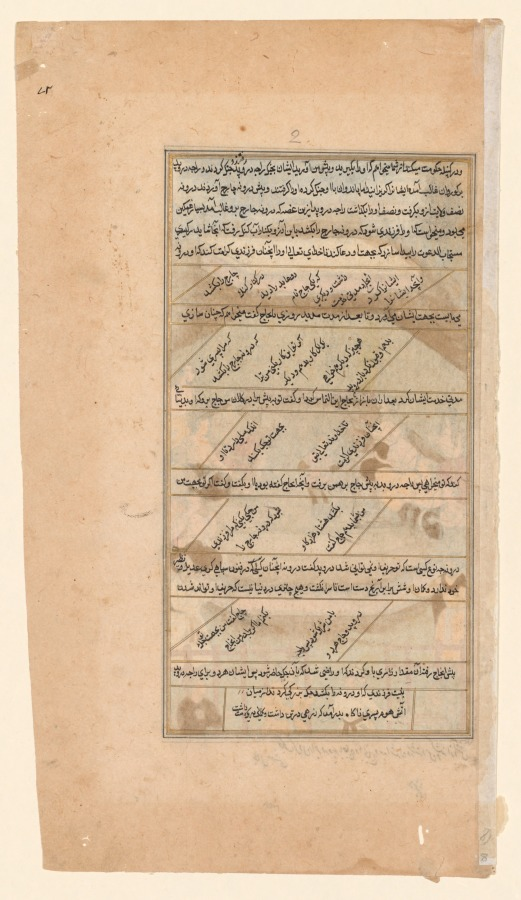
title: Yaja and Upayaja perform a sacrifice for the emergence of Dhrishtadyumna from the fire, from Adi-parva (volume one) of the Razm-nama (Book of Wars) adapted and translated into Persian by Mir Ghiyath al-Din Ali Qazvini, known as Naqib Khan (Persian, d. 1614) from the Sanskrit Mahabharata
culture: Mughal India; made for Abd al-Rahim the Khan Khanan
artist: attributed to Bilal Habshi (probably Ethiopian, active late 1500s)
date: 1598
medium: Gum tempera, ink, and gold on paper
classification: Painting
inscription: Inscriptions around painting: Ascribed to Bilal Habashi (probably Ethiopian, active late 1500s) Mughal court, made for Abd al-Rahim the Khan Khanan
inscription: Persian inscription in bottom margin, in nasta‘liq script: The performing of a sacrifice by King Drupada with Yaja and Upayaja and the appearing of Dhrishtadyumna and Draupadi from the fire; Bilal-i Habashi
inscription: Persian inscription at edge of bottom margin, in nasta‘liq script: and sword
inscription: Calligraphy: Persian text in naskh script: “. . . and rules in Panchala. I want you to take him and bring him to me.” They went to war with Drupada and fought a battle, and King Drupada managed to overcome the Kauravas and put them to flight, but the Pandavas fought him and brought him to Master Drona. Droṇa took half of his [Drupada’s] kingdom from him and left him the other half. King Drupada was extremely distressed that Master Drona had overcome him and wished he could have an offspring who would kill Master Drona. With this desire in his mind, he went to the shores of the Ganges River so that perchance he could find a person whose prayers on his behalf to the almighty God to graciously bestow upon him an offspring capable of killing Droṇa would be accepted. By the banks of the Ganges he saw two pious worshipers. One was called Yaja and the other Upayaja. He spent some time there performing services for them and bringing them whatever they required. After a long while, one day he said to Upayaja: “I would like you to do what is needed so that I have a son who could kill Master Drona. If you do this I will give you one lakh [a hundred thousand] of cows and whatever else you demand.” Upayaja did not accept this. Once again Drupada spent time at their service, and then once again he begged Upayaja to do this. He said: “Go to my elder brother Yaja, since he still has a little attachment to this world, so that he can perform the sacrifice for you, so that the almighty God would bestow on you the offspring that you desire.” King Drupada went therefore to Yaja the brahmin and told him what Upayaja had told him and said: “If you perform the sacrifice for me so that I have son who would kill Master Drona, I would give you eighty thousand cows.” Yaja said, “What kind of a person is Master Drona that you do not deem yourself a match for him?” Drupada said, “Droṇa is the kind of person who remains without rival and peer in the arts of war. His bow is six times the length of the elbow to the fingertip, and nothing in the world can rival and overcome him.” Yaja said: “I will perform the sacrifice for you, so long as my brother Upayaja joins forces with me.” So King Drupada and Yaja both went to Upayaja and pleaded so long that he at last agreed to be present at the sacrifice. They thus made a wish for King Drupada to have a son to kill Droṇa and made a big sacrifice, and from the midst of the sacrificial fire suddenly a son emerged clad in a coat of mail holding a bow in one hand.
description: Fire sacrifice was central to the Indo-European people who entered the Indian subcontinent as early as 1800 BC. Only Brahmins, a social class of priests, had access to the sacred texts called the Vedas, which explained the meaning and process of the fire sacrifice, considered by orthodox Hindus as a way to communicate with the gods. A king named Drupada in ancient India sponsored this fire sacrifice in order to generate a powerful warrior who would be able to slay the enemy who took half his kingdom. Seated around an altar in the sacrificial enclosure, Brahmins pour oblations into the fire and recite the prayers necessary to generate the divine warrior Dhrishtadyumna, shown here in full battle armor at birth. The inscription below gives the title and the name of the artist, Habshi, which means “Ethiopian,” suggesting the presence of Africans in the royal Mughal workshop. The story of how the warrior Dhrishtadyumna was generated from the fire sacrifice is written on this page. When King Drupada lost half his kingdom to a military master named Drona, he needed a gift from the gods to defeat him: a new warrior born to accomplish this mission. In order to obtain this gift, King Drupada went to the banks of the Ganges to find two powerful Brahmins to whom the gods would respond favorably. After serving them faithfully and offering payment of 100,000 cows, the Brahmins Yaja and Upayaja agreed to perform the sacrifice. The text is written in a form of Arabic script, called naskh, in the Persian language, as translated from the original Sanskrit epic Mahabharata for emperor Akbar (r. 1556¬–1605). The passages of dialogue are written diagonally.